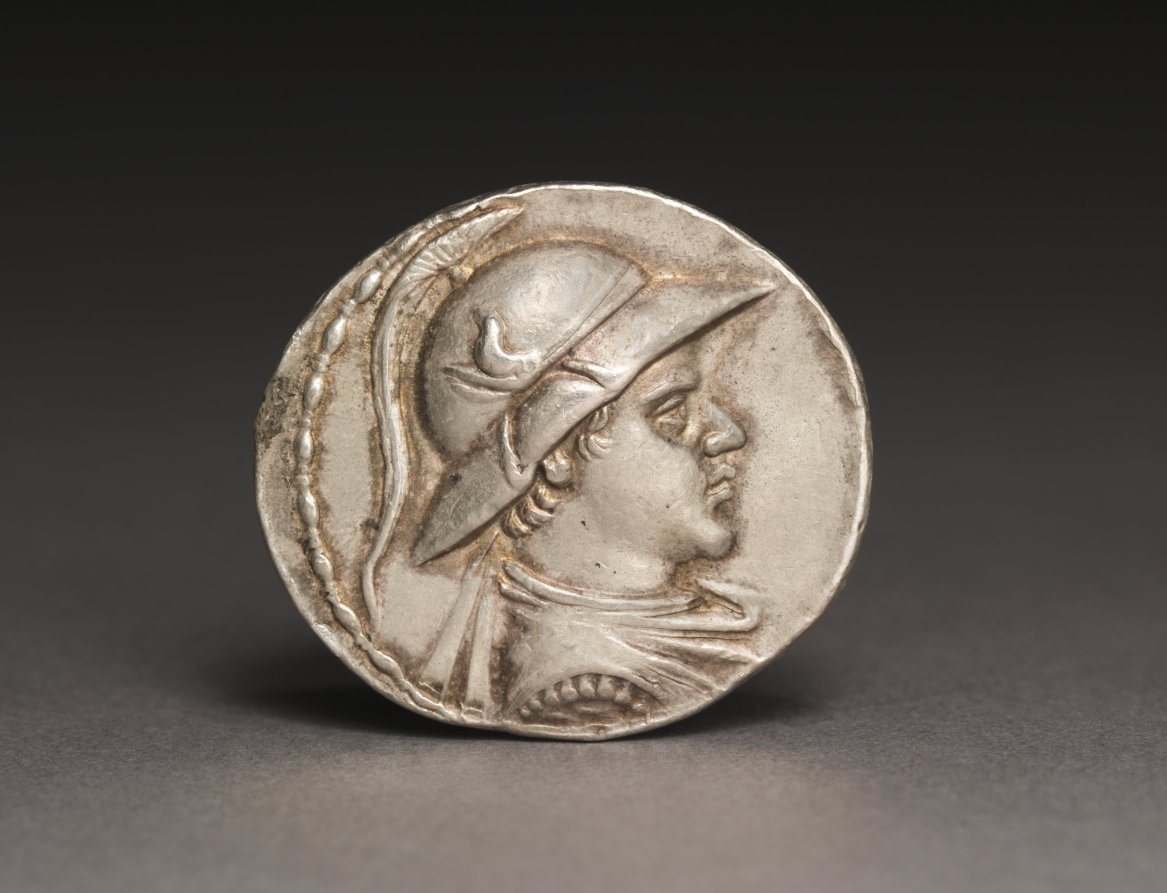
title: Coin of Eukratides I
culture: Afghanistan, Bactria, Eucratides I (171–145 BCE)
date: 170–145 BCE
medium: silver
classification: Coins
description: After Alexander of Macedon succeeded in conquering Egypt and Persia in 331 BC, his ambition to rule the known world led him further east across Bactria in Afghanistan, through the Hindu Kush mountain pass, and into India. There he succeeded in defeating all the local kings of the region until his men, on the brink of mutiny, insisted that they return to Greece. Alexander left governors in charge of his territories, and after his death in 323 BC, his governors became independent kings, establishing Hellenistic cities and a Greek cultural base in the region, which lasted for almost 200 years. The king of Greek descent who ruled over territories in Afghanistan and Pakistan depicted himself with the brimmed military helmet with the bull's ear and horn of Poseidon, worn by generals from Macedon, the northern Greek country from which Alexander came. After his death, Alexander's vast empire that stretched from Macedon across Egypt and Persia all the way to the Indus River was divided among military leaders in his army. On the reverse side of this coin are the twins Castor and Pollux riding horseback with long spears. These twins were sons of Zeus. Since Alexander considered himself to be an offspring of Zeus, Eukratides referenced his link to Alexander by including them on his coin.